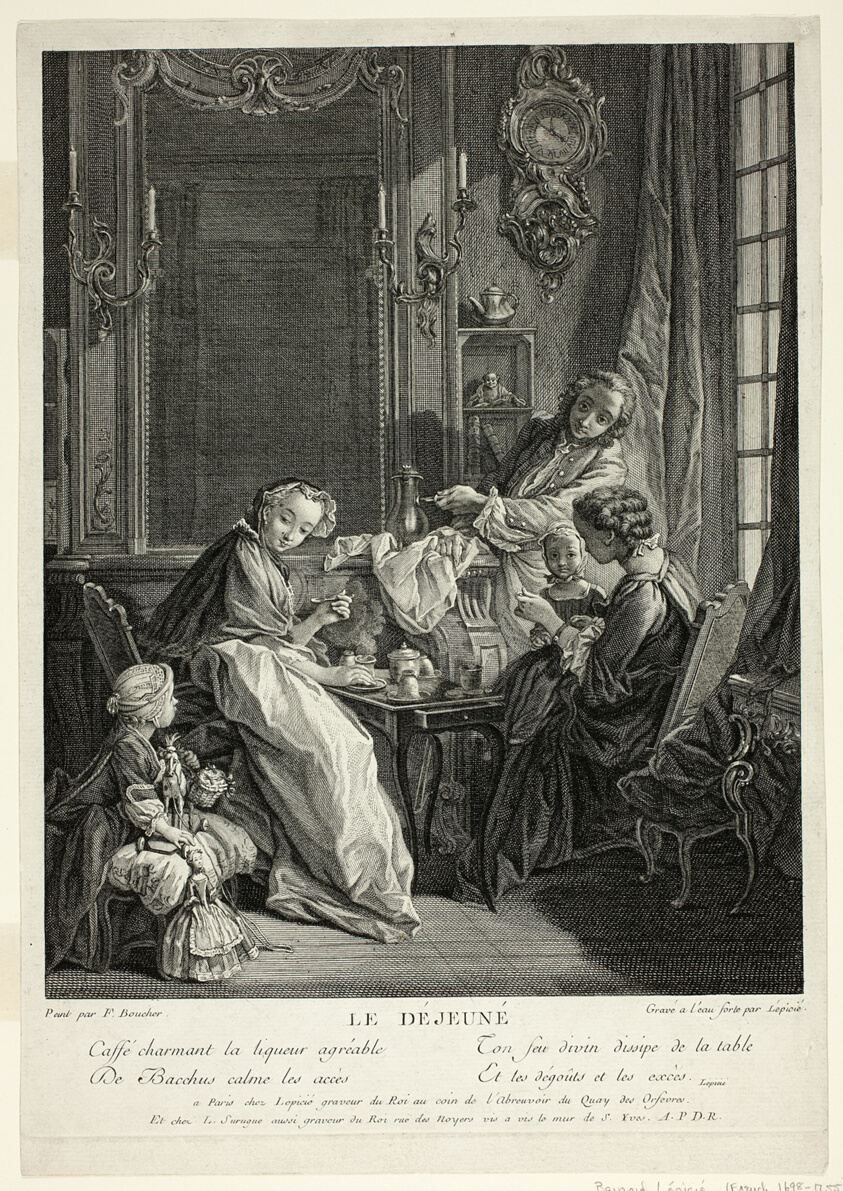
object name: Print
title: Breakfast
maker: François Bernard Lépicié (French, 1698-1755); after François Boucher (French, 1703-1770)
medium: Etching on paper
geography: France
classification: etching; print; prints and drawing